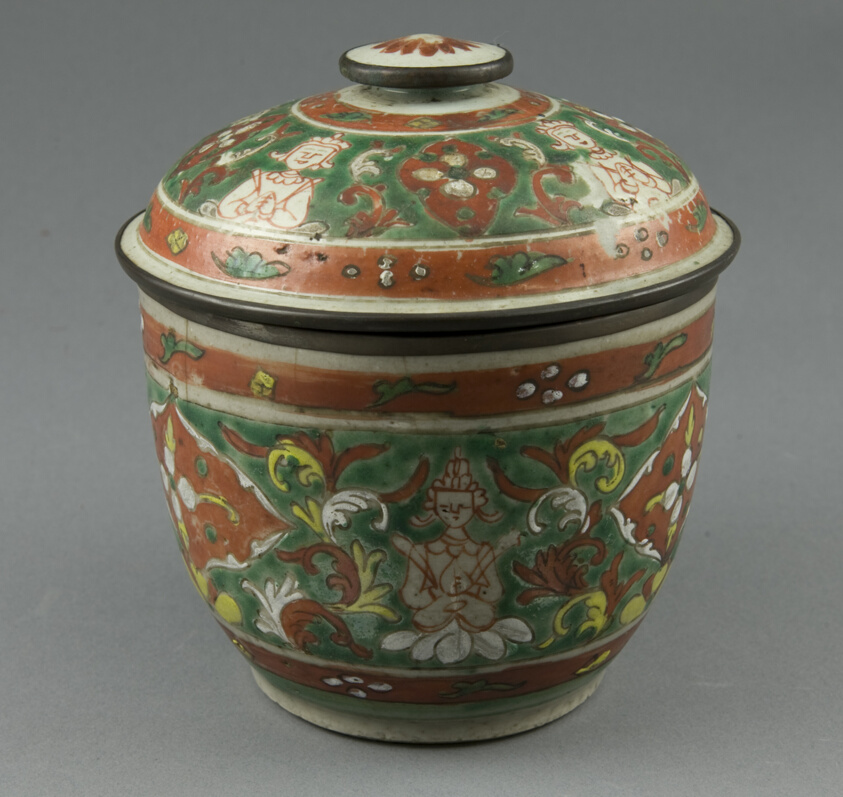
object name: Decorative Arts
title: Bencharong (Five-Colored) Ware, Covered Jar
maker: China, for the Thai Market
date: 19th century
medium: Porcelain painted in overglaze polychrome enamels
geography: China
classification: porcelain; asian art; ceramics; decorative arts